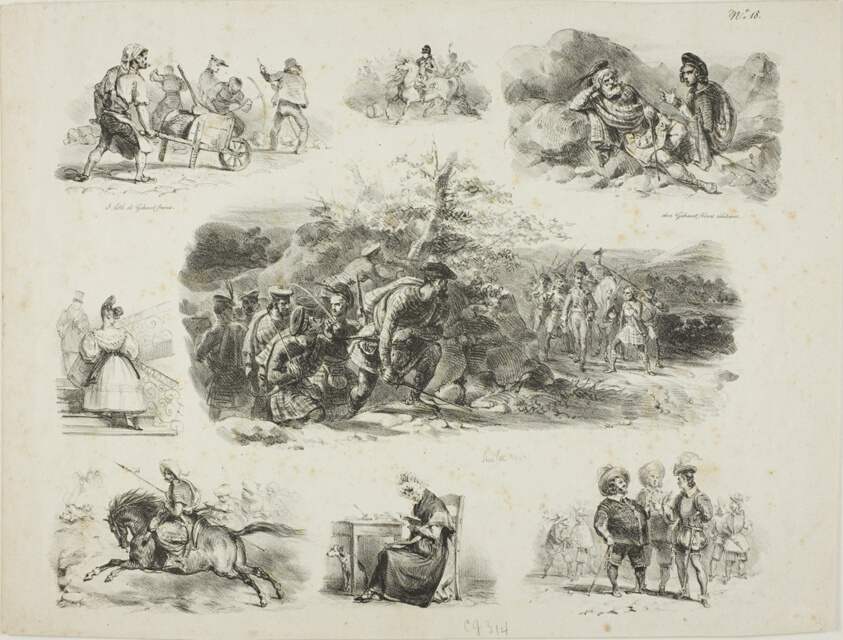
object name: Print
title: Sheet of Sketches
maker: Denis Auguste Marie Raffet (French, 1804-1860); published by Chez Gihaut Frères (French, 19th century)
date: 1829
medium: Lithograph in black on ivory wove paper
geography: France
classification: lithograph; print; prints and drawing